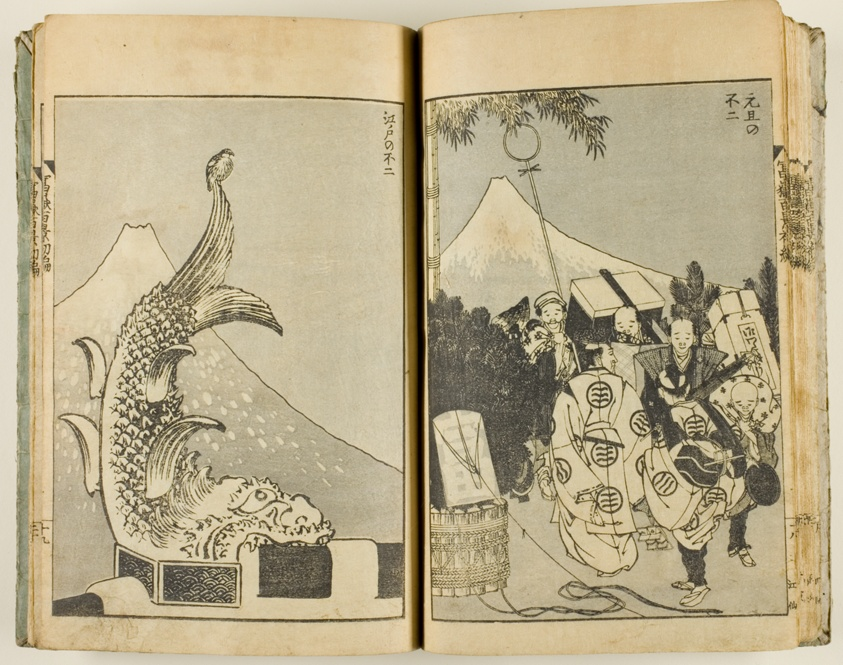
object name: Book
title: Fugaku hyakkei (100 Views of Mt. Fuji)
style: Japanese (culture or style)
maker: Katsushika Hokusai 葛飾 北斎; Japanese, 1760-1849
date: v. 1–3 of 3 published, 1834–5 (v. 1–2), c. 1849 (v. 3)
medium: book; woodblock printed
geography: Japan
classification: book; woodblock print